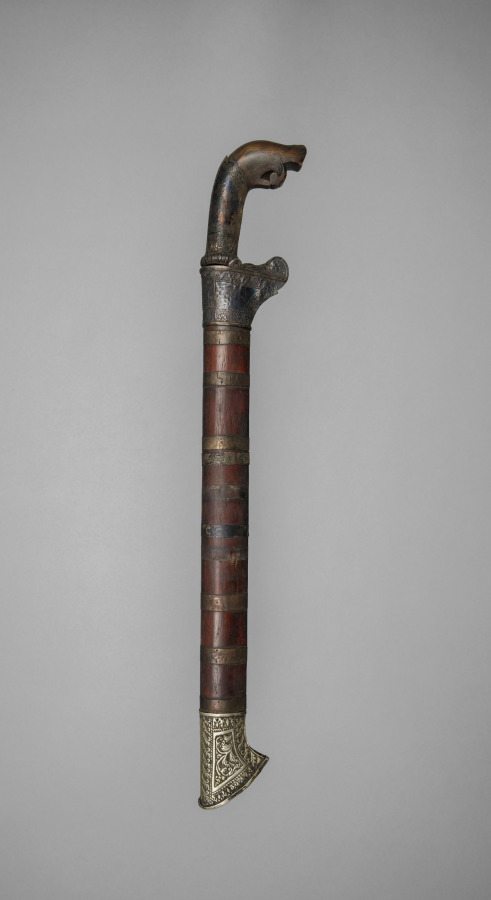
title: Sword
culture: Indonesia, Sulawesi (Celebes)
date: before 1918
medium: metal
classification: Arms and Armor